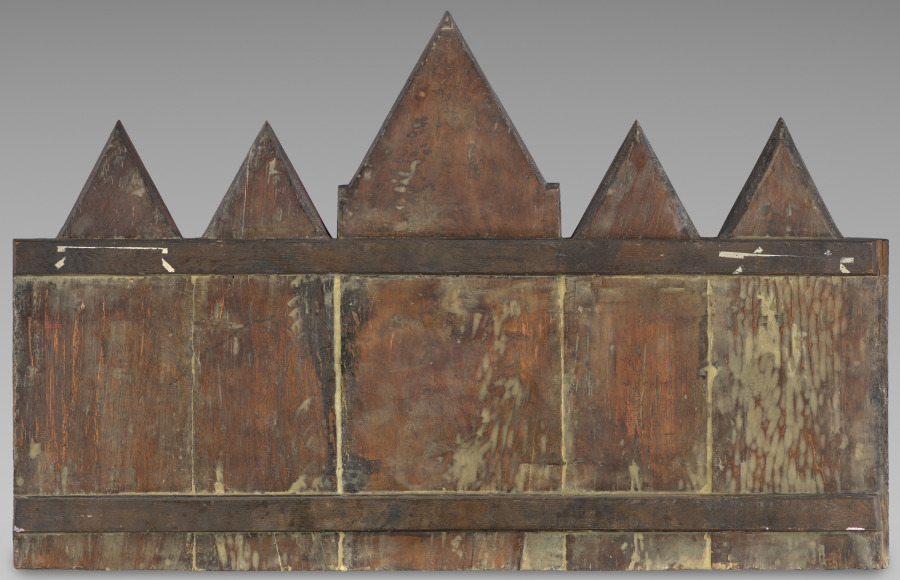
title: Virgin and Child with Saints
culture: Italy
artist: Ugolino di Nerio (Italian)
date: c. 1320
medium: tempera and gold on wood panel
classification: Painting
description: In medieval Italian churches, painted altarpieces served as the focal point for worshippers during the rituals of faith. The figures of Jesus, Mary, and eight saints are framed by a golden background that would have glistened in the flickering candlelight of the church.